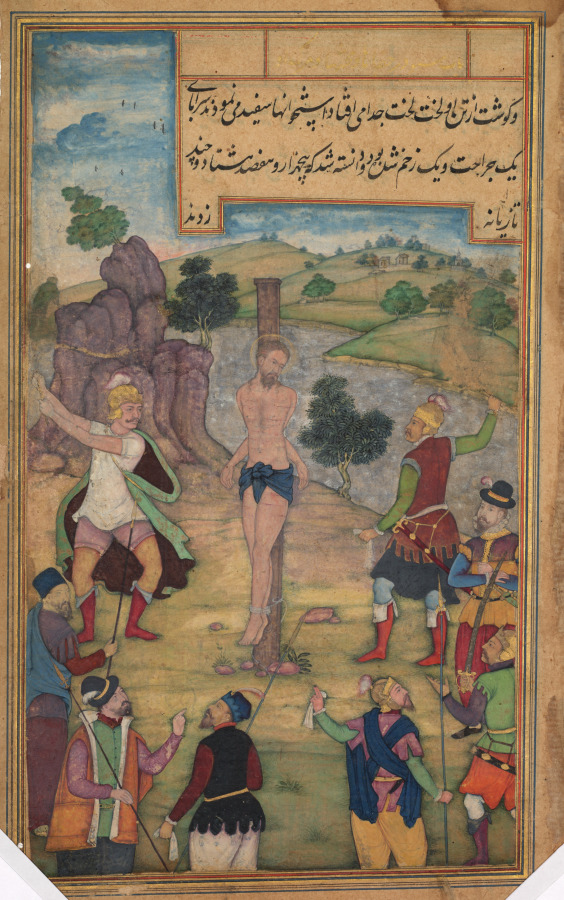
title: The Flagellation (folio 182 recto), from a Mirror of Holiness (Mir’at al-quds) of Father Jerome Xavier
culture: Mughal India, Allahabad, made for Prince Salim (1569–1627)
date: 1602–4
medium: Gum tempera, ink, color, and gold on paper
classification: Manuscript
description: Two Romans flog Jesus, who has been bound to a stake at the center of the circular composition made up of soldiers and the hilly horizon. His subtly articulated expression conveys both pain and compassion, as he endures cuts to his flesh and the bindings around his elbows that secure him so tightly to the post that his feet are elevated off the ground. This is the last illustration in the Cleveland manuscript of the Mirror of Holiness. The Crucifixion was never illustrated, possibly because the patron, Prince Salim, was Muslim. According to the Koran, Jesus did not die on the cross, but was absorbed into heaven by Allah.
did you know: A halo encircles Jesus’s head, and his hair and beard are highlighted with gold.